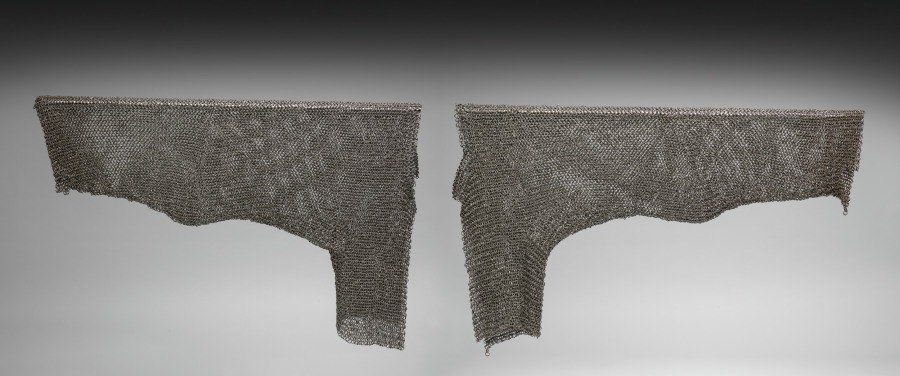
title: Sleeves of Chain Mail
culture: Germany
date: 1500s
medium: steel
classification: Arms and Armor